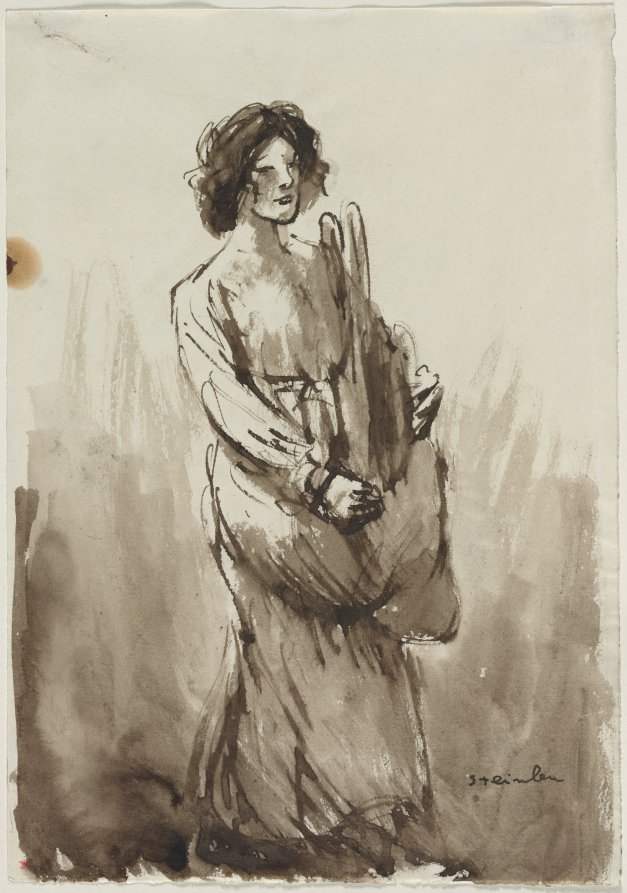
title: The Bread Carrier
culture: Switzerland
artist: Théophile Alexandre Steinlen (Swiss, 1859–1923)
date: fourth quarter 19th century or first quarter 20th century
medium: brush and brown ink and wash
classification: Drawing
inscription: signed, lower right, in brown ink: Steinlen ; lower left, in red pencil: S[illegible] ; VERSO, lower left, in graphite: a 94145 ; lower left, in graphite: Porteuse du pain ; lower right, in graphite: cx. upper left, in blue crayon: 34 [circled] ;